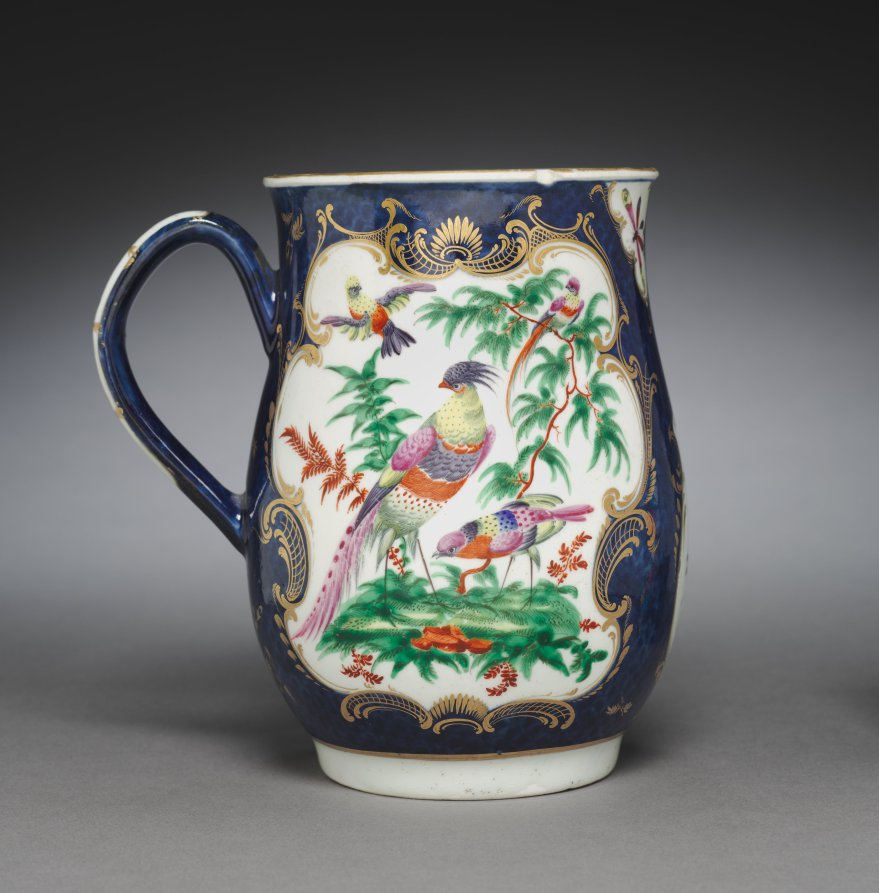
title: Tankard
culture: England, 18th century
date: c. 1770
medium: ceramic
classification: Ceramic